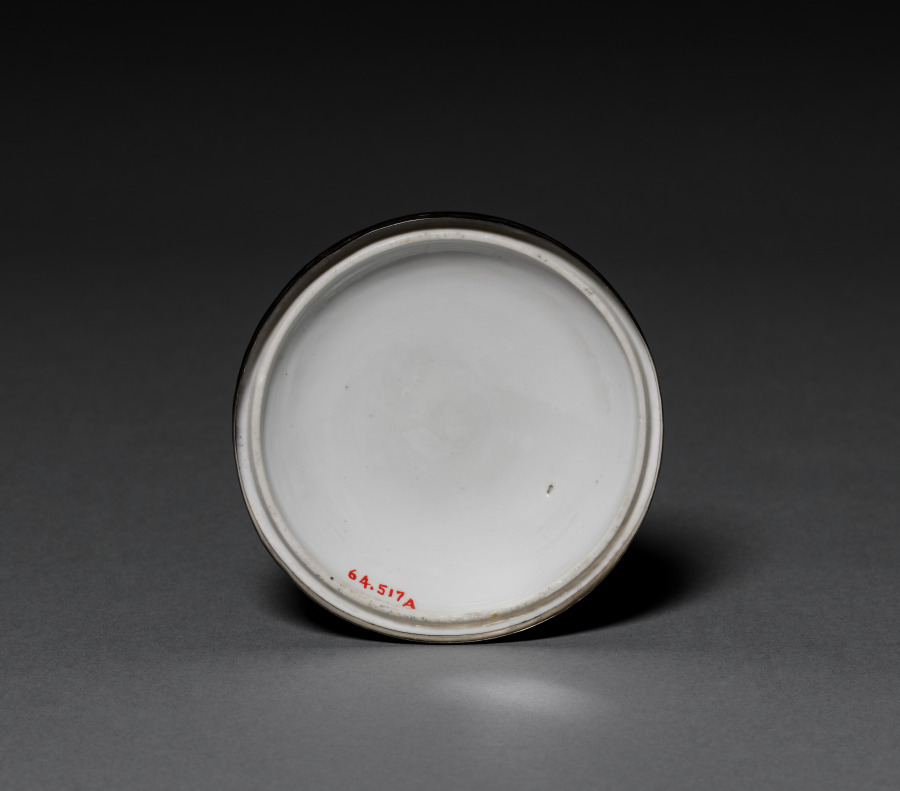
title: Lid for a Jar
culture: France, 18th century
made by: Faubourg Saint-Denis (French)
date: c. 1775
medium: porcelain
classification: Ceramic